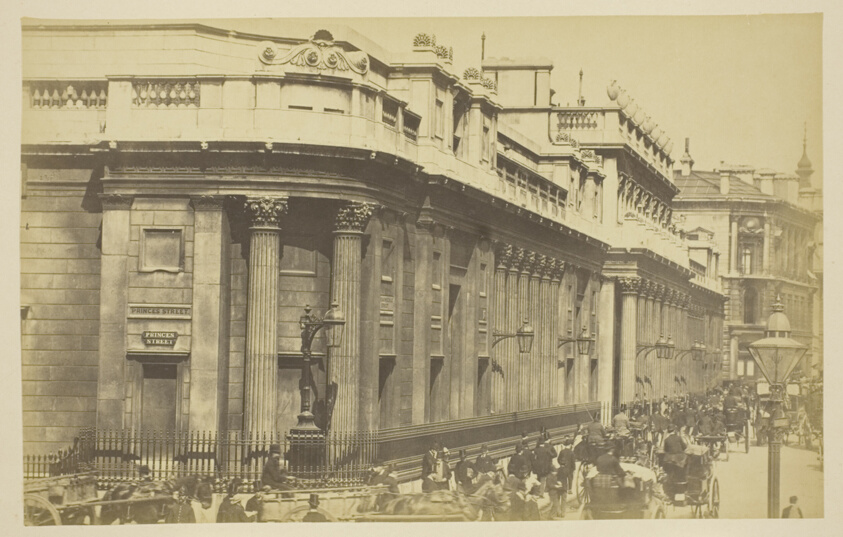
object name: Photograph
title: The Bank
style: 19th century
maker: Artist unknown; probably English, 19th century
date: 1850–1900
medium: Albumen print, from the book "Views of London"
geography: England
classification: albumen silver print; photographic process; photography; photograph